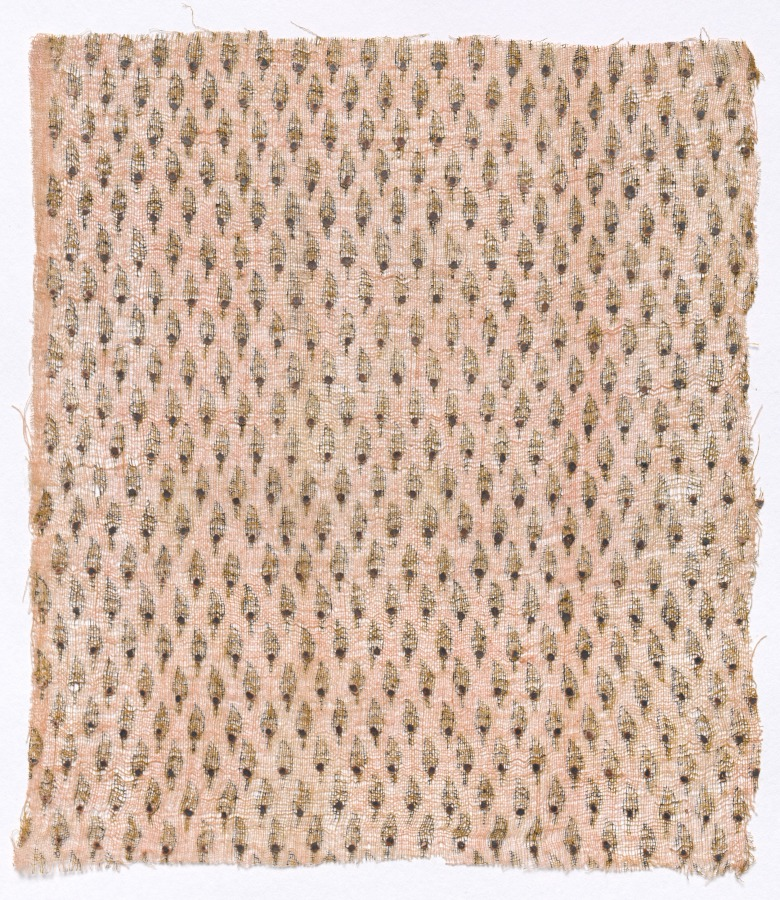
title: Fragment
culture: India, Rajasthan or Northern Deccan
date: 1700s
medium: Block printed and overpainted with silver leaf (varak) on dyed plain weave cotton muslin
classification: Textile